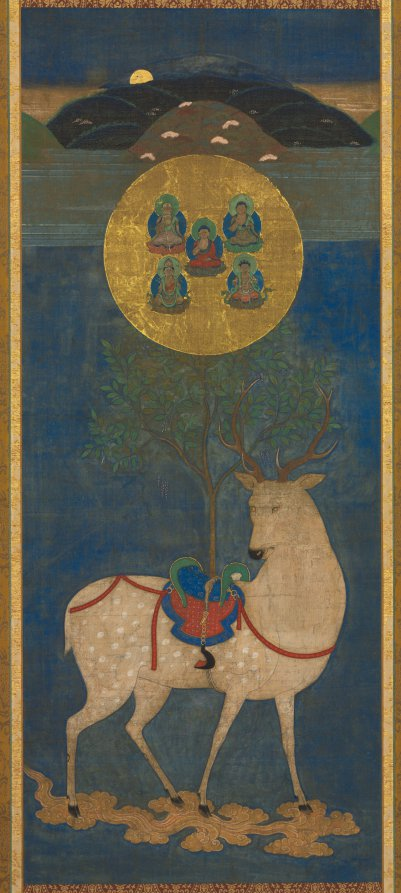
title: Kasuga Deer Mandala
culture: Japan, Nanbokuchō period (1333–92) to Muromachi period (1392–1573)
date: mid-1300s–1400s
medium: hanging scroll; ink, color and gold on silk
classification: Painting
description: Riding on a rolling cloud, a spotted deer wears a brightly colored saddle. The saddle supports a branch of the evergreen Sakaki tree, trailing wisteria vines that cradle a large golden mirror. Within the mirror sit the five Buddhist manifestations (honjibutsu) of the deities (kami) of the Kasuga Grand Shrine in Nara. The presence of the deer—the vehicle of the deity Takemikazuchi no Mikoto of the first of the five halls of the shrine—and the characteristics of the mountain range at the top of the painting make clear the association with the sacred site of Kasuga. The painting was likely created for an individual’s personal devotions to the Kasuga deities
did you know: The deity Takemikazuchi no Mikoto is shown as the Buddha Shakyamuni with a red robe.